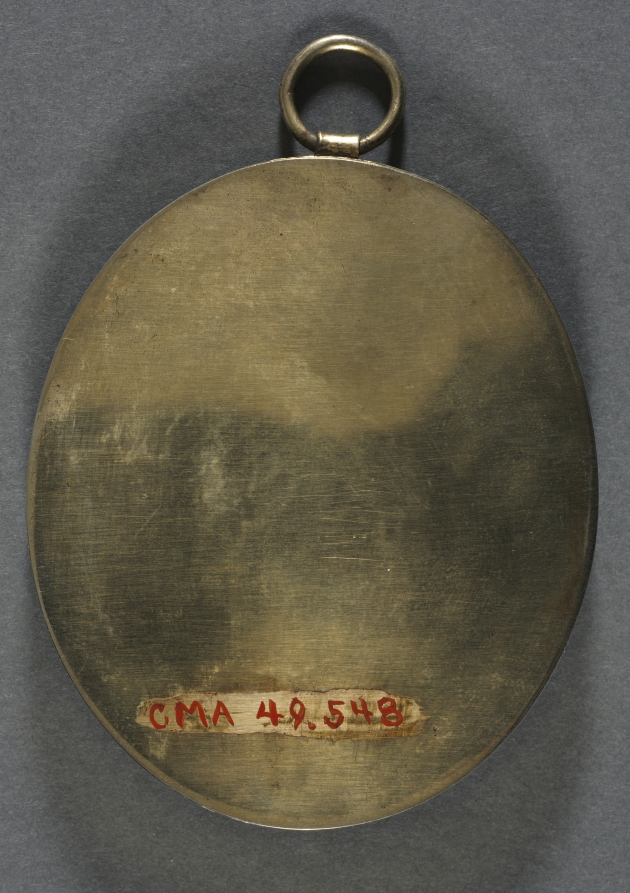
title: Portrait of Thomas Hobbes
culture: England, 17th century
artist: Samuel Cooper (British, 1608/09–1672)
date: c. 1660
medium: watercolor on vellum in a gilt metal frame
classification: Portrait Miniature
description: In his seventies when the portrait was painted, Thomas Hobbes (1588–1679) is turned slightly to his left, his eyes directed at the spectator. He has thin gray hair extending to his collar and a gray mustache and goatee. Only his head is finished; a thin gray wash loosely describes a plain, flat collar. Hobbes was born in Malmesbury, Wiltshire. In spite of humble parentage, he rose to prominence as a brilliant linguist and author of the 1651 book Leviathan, a seminal work of social contract theory that advocated for government led by a strong sovereign. As a royalist he was forced to flee England when the civil war broke out in 1642, and he resided in France until the war’s end in 1651. He was a friend of Cooper, who painted his miniature on at least two occasions.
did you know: A replica of Cleveland’s miniature was painted by Lady Margaret Bingham, Countess of Lucan.